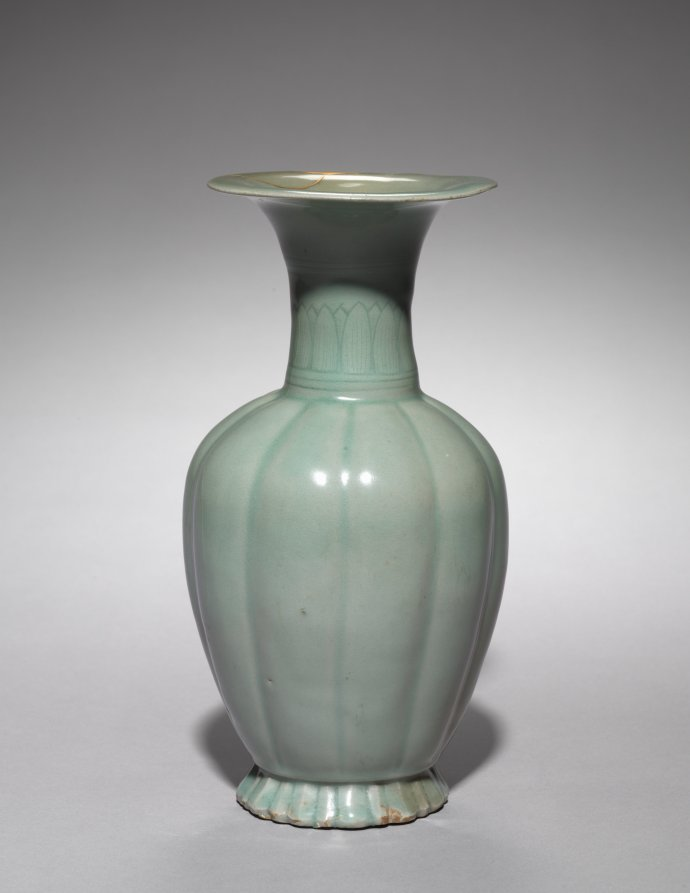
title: Vase in the Form of a Melon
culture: Korea, Goryeo dynasty (918–1392)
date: 1100s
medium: celadon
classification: Ceramic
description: As early as the seventh century, the practice of drinking tea and wine became an important part of elite culture in Korea. Elites of the Goryeo period commissioned a variety of types of utensils and vessels including this elegant bottle, not only to make their drinking experience more exciting, but also to show their appreciation of nature. During the Goryeo period (918-1392), kilns operated in Jeolla and Chungcheong provinces, meeting a soaring demand for high-quality tableware.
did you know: The shape of this bottle resembles is a type of yellow muskmelon cultivated mainly in East Asia.